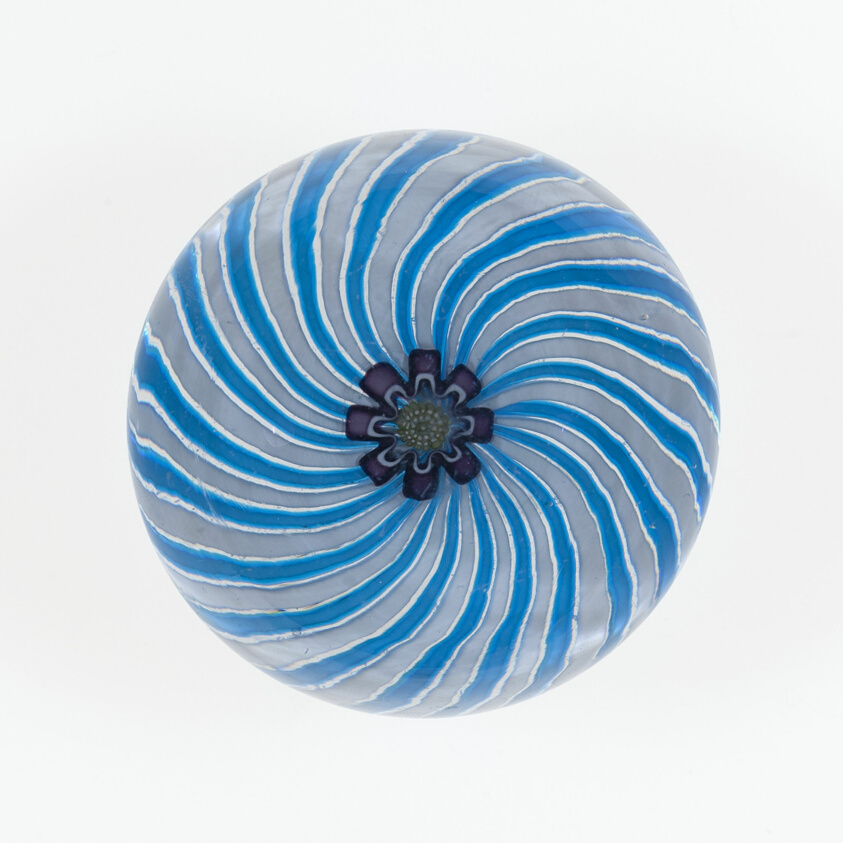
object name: Glass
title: Paperweight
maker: Clichy Glassworks (Cristalleries de Clichy); Clichy, France, 1837-1885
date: c. 1845–60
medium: Glass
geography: Clichy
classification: paperweight; glass